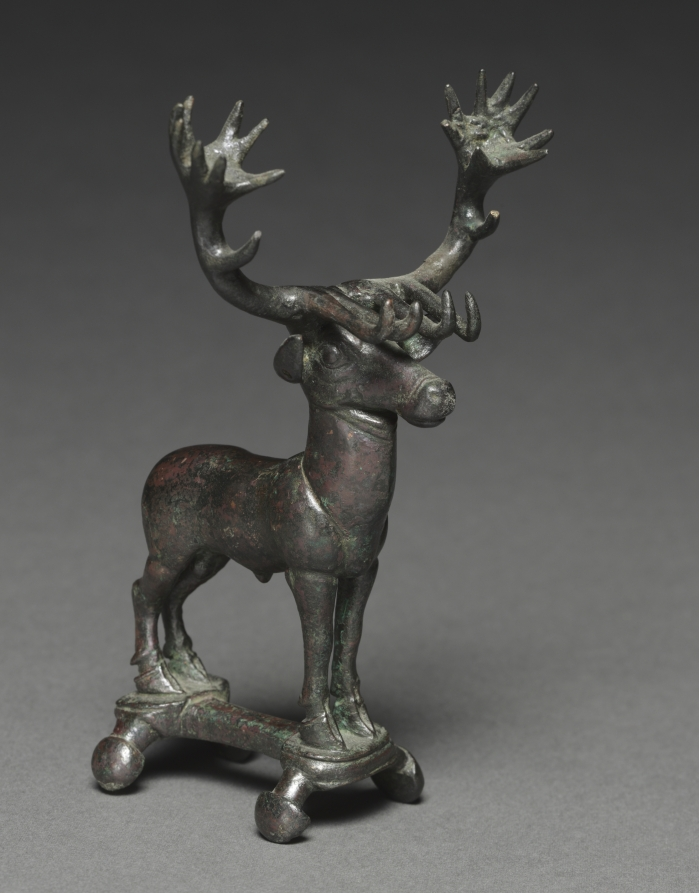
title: Stag Poletop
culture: Eastern Anatolia, Hittite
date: 1400–1200 BCE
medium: bronze, solid cast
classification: Sculpture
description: The stag was sacred to the Hittite god of the countryside.